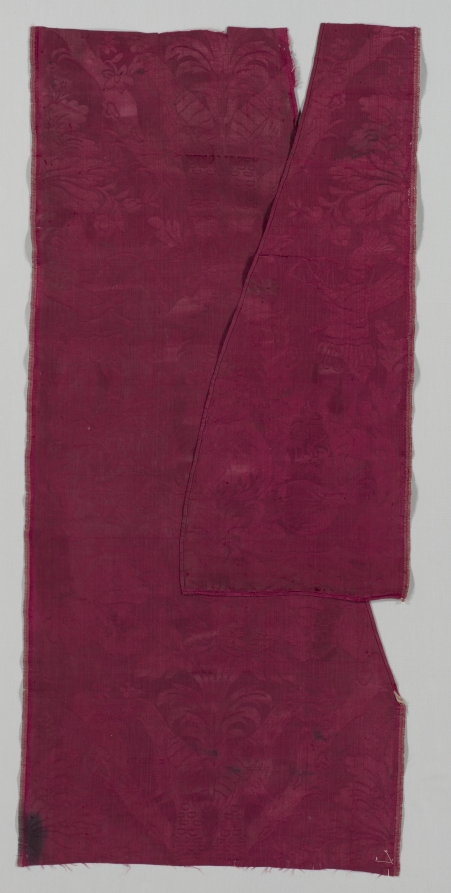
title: Length of Silk Damask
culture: Italy, late 17th century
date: late 1600s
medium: damask, silk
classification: Textile